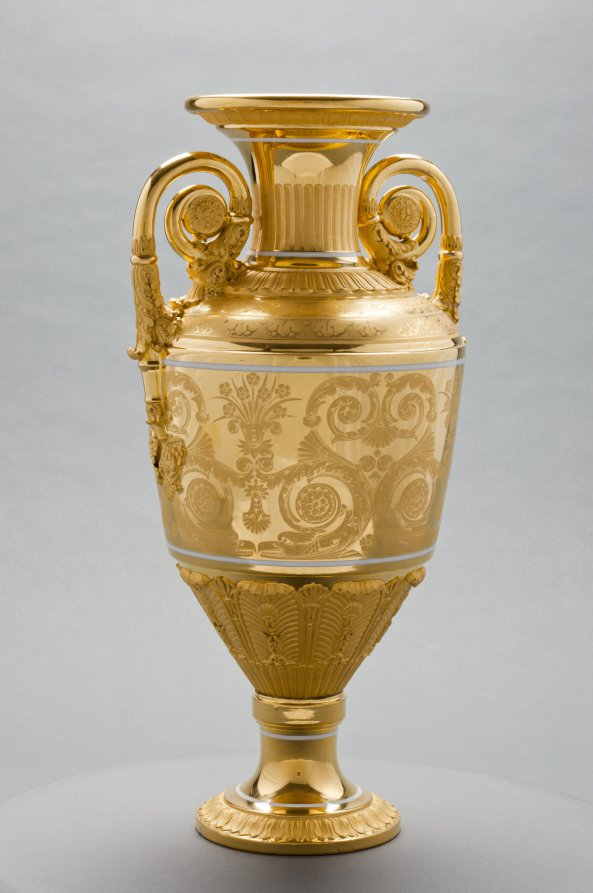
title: Vase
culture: Russia, St. Petersburg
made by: St. Petersburg Imperial Porcelain Factory (Russian)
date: c. 1820–1830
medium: gilt porcelain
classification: Ceramic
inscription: inscribed: "Moreau" in gold near lip.